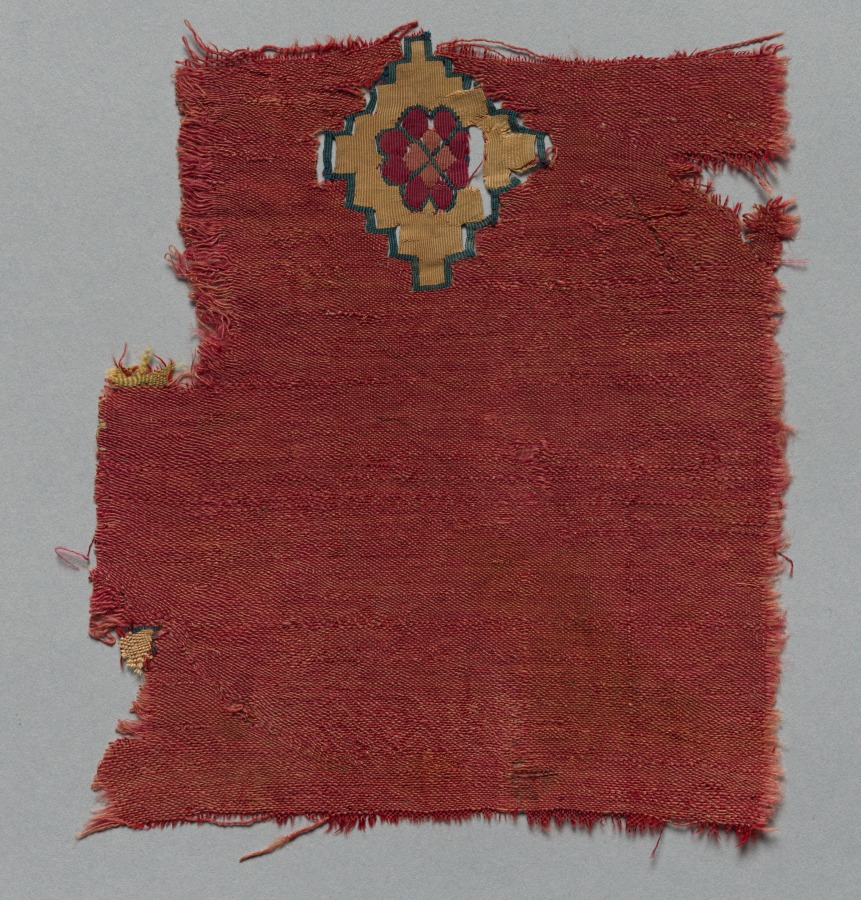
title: Fragment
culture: Iran or Iraq, Abbasid period (750–1258) ?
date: 800s–1000s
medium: tapestry weave: silk and wool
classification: Textile